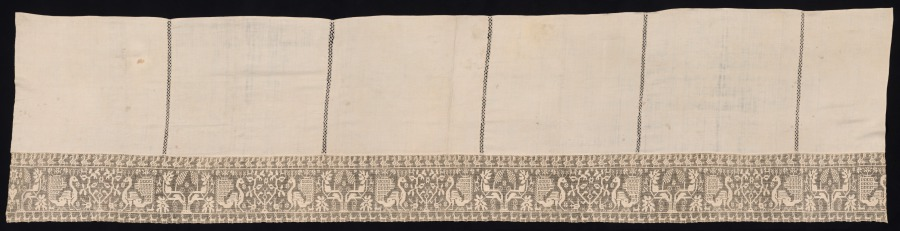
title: Cloth with Border of Peacocks and Vegetation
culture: Italy, 1600s-1700s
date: 1600s–1700s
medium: plain weave bleached linen (est.): needle lace, burato (twined ground and darned in one direction)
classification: Lace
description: This large cloth shows a repeated pattern of confronted peacocks flanked by decorative motifs. More birds appear in the register above, and a pattern of four-legged animals is in the register below.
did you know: Based on the ancient belief that the peacock’s flesh never decayed, they became a symbol of immortality and the Resurrection of Christ.